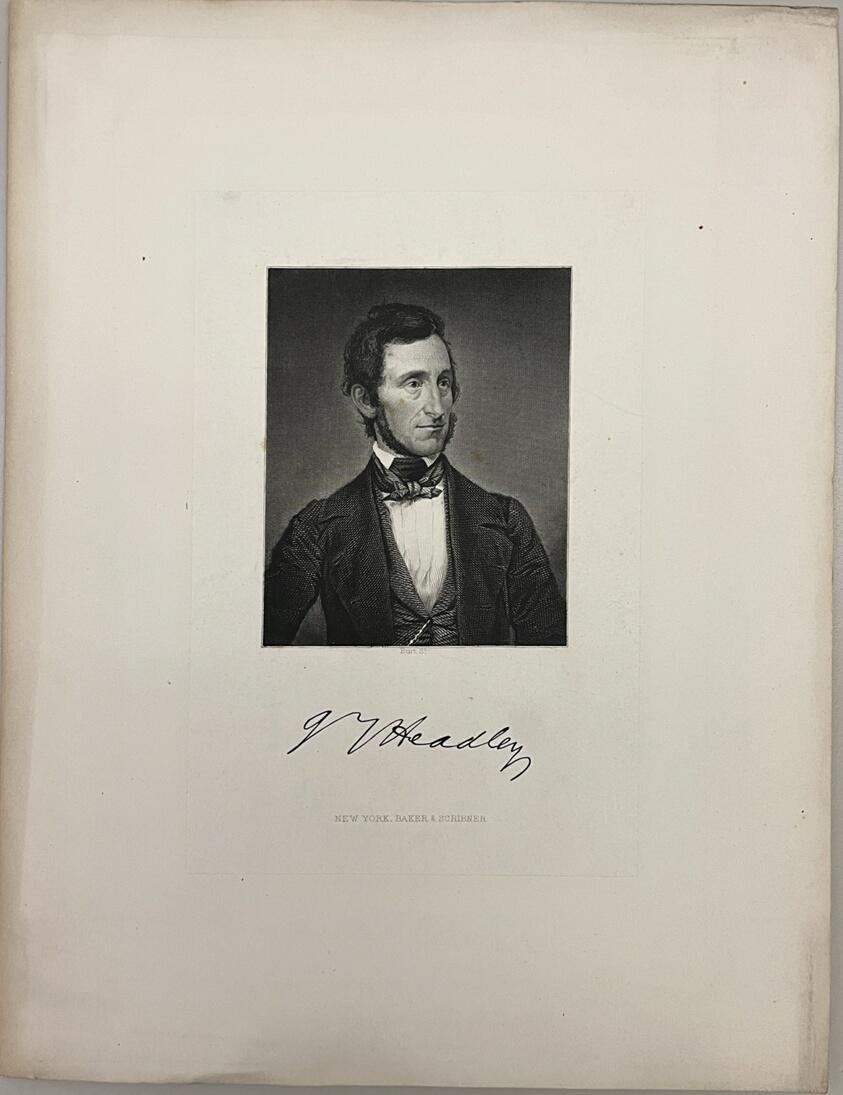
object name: Print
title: V Meadley [?]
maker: Artist Unknown (Likely American, 19th century)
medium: Etching on paper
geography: United States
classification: reproduction; print; prints and drawing